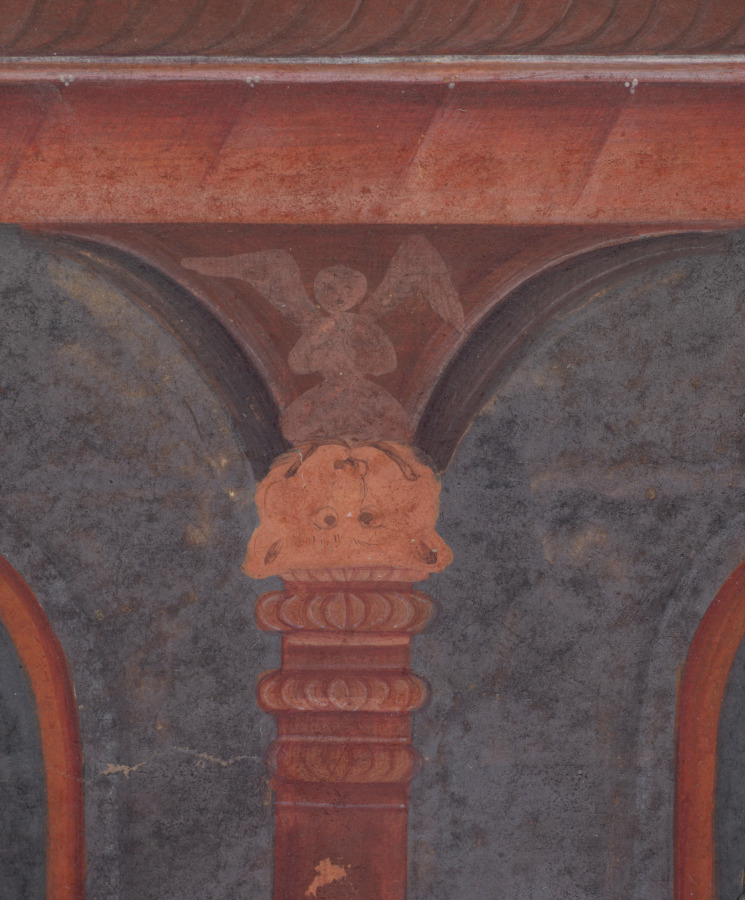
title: Salome Receiving John the Baptist’s Head on a Platter (folio 112 verso), from a Mirror of Holiness (Mir’at al-quds) of Father Jerome Xavier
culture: Mughal India, Allahabad, made for Prince Salim (1569–1627)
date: 1602–4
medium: Gum tempera, ink, color, and gold on paper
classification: Manuscript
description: Herod, King of Judea, sits on a Mughal-style throne as his wife’s daughter Salome reaches for the freshly severed head of John the Baptist. John had offended Herod’s wife, so she took revenge by having her daughter seduce Herod into granting her this wish. Salome is depicted modestly in this painting, and the court musician at the lower left looks on in disgust. The lion head capitals on the pillars above Herod are upside down, seemingly in disapproval of the debauched king.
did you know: Column capitals in Herod’s palace have angels seated on upside-down lion heads.